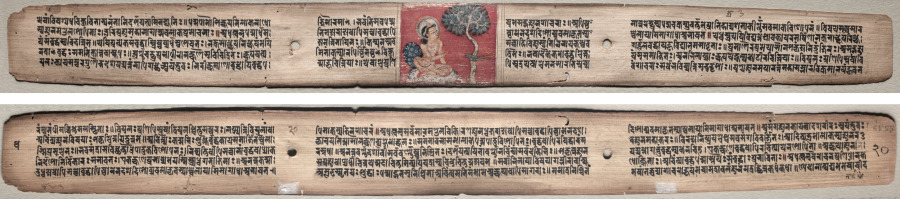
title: Folio 20 from a Gandavyuha-sutra (Scripture of the Supreme Array): Sudhana and a parrot (recto); Text (verso)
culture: Nepal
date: 1000–1100s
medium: gum tempera and ink on palm leaf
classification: Painting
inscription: uttānīkurvan saṃprakāśayan avabhāsayan prabhāsayan upadiśan dharmadhātunayena ākāśadhātusamatayā tryadhvasamatayā dharmadhātusamatayā sattvadhātusamatayā sarvalokadhātusamatayā sarvakarmavaṃśasamatayā sattvāśayasamatayā sattvādhimuktisamatayā dharmapratibhāsasamatayā sattvaparipākakālasamatayā sarvajagadindriyasamatayā ca, evaṃ siṃhavijṛmbhitaṃ tathāgatasamādhiṃ caiṣāṃ bodhisattvānāṃ saṃprakāśayati sma daśabhirnirdeśapadaiḥ / katamairdaśabhiḥ? yaduta sarvadharmadhātuparyāpanneṣu buddhakṣetrapramāṇurajaḥsarvabuddhaparaṃparākṣetraparaṃparānirdeśaḥ / yaduta ākāśadhātuparameṣu sarvabuddhakṣetreṣu aparāntakoṭīgatakalpatathāgataguṇānucaraṇanirdeśaḥ / yaduta sarvabuddhakṣetratathāgatasamutpattyanantamadhyābhisaṃbodhimukhasamudrasaṃdarśananirdeśaḥ / yaduta ākāśadhātuparamabuddhakṣetratathāgataparṣanmaṇḍalabodhisattvasaṃghabodhimaṇḍābhimukhāvasthānanirdeśaḥ / yaduta sarvatryadhvabuddhakāyasadṛśanirmāṇasarvaromamukhapramuñcanacittakṣaṇadharmadhātuspharaṇanirdeśaḥ / yaduta sarvadiksamudreṣu sarvakṣetrasāgarasamatalādhiṣṭhānaikakāyaspharaṇaprabhāsanirdeśaḥ / yaduta sarvārambaṇataleṣu buddhabhūmivikurvitasarvatryadhvasamavasaraṇadhiṣṭhānasaṃdarśananirdeśaḥ / yaduta sarvakṣetraparamāṇurajaḥsamatryadhvakṣetraparaṃparānānābuddhavikurvitakalpasāgarasaṃdarśananirdeśaḥ / yaduta sarvatryadhvabuddhapraṇidhānasāgarasarvaroma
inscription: nigarjanāparyantādhiṣṭhānabodhisattvasaṃbhavanirdeśaḥ / yaduta dharmadhātupramāṇabuddhasiṃhāsanabodhisattvaparṣanmaṇḍalāsaṃbhinnabodhimaṇḍālaṃkāranānādharmacakrapravartanāparāntādhiṣṭhānanirdeśaḥ / iti hi bho jinaputrā etān daśān pramukhān kṛtvā anabhilāpyabuddhakṣetraparamāṇūrajaḥsamān etasya siṃhavijṛmbhitasya samādhinirdeśananugacchāmi / api tu khalu punarbho jinaputrāḥ tathāgatajñānagocara eṣaḥ // atha khalu samantabhadro bodhisattva etasyaiva siṃhavijṛmbhitasya tathāgatasamādherarthanirdeśaṃ dyotayamāno buddhādhiṣṭhānena tathāgatavadanaṃ prekṣamāṇaḥ sarvāvantaṃ parṣanmaṇḍalasamudraṃ vyavalokya acintyabuddhaviṣayānantamadhyatathāgatasamādhivikurvitāni vyavalokya acintyajñānamāyāgatadharmatāṃ vyavalokya acintyatrayadhvabuddhasamatāṃ vyavalokya acintyānantamadhyasarvavākpathaniruktisarvadharmanayān vyavalokya tasyāṃ velāyāmimā gāthā abhāṣata - sarvakṣetraparamāṇusādṛśā ekaromi jinakṣetrasāgarāḥ / bodhisattvaparṣatparīvṛtastatra buddha sthitu buddhaāsane // 1 // (Gv 26) ekaromi bahukṣetrasāgarā bodhimaṇḍasthita padmaāsane / dharmadhātu vipulam karitvanā dṛśyate drumavareṣu nāyakaḥ // 2 // sarvakṣetraparamāṇusādṛśā ekaromi jina saṃniṣaṇṇakāḥ / bodhisattvaparṣatparīvṛtāḥ sarvabhadracariyāṃ prabhāṣate // 3 // ekakṣetri jina saṃniṣaṇṇakāḥ sarvakṣetraprasarān spharitvanā / bodhisattva bahumegha akṣayā enti te daśadiśāṃ samantato // 4 // kṣetrakoṭiparamāṇusādṛśā bodhisattvaguṇasāgaraprabhāḥ / utthihantu parṣāsu śāstuno dharmadhātu sphariṣu daśa diśaḥ // 5 // sarvakṣetrapratibhāsadarśa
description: A young male figure, probably the pilgrim Sudhana, sits on a cushion with a bolster and interacts with a parrot, perched on the trunk of a tree. Sudhana's gesture indicates that the bird should not be afraid. Most pages from this dispersed 355-folio manuscript have a single painting only on the recto side.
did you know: The pages would have been bound into the book by strings running through the two holes in the center of the pages.